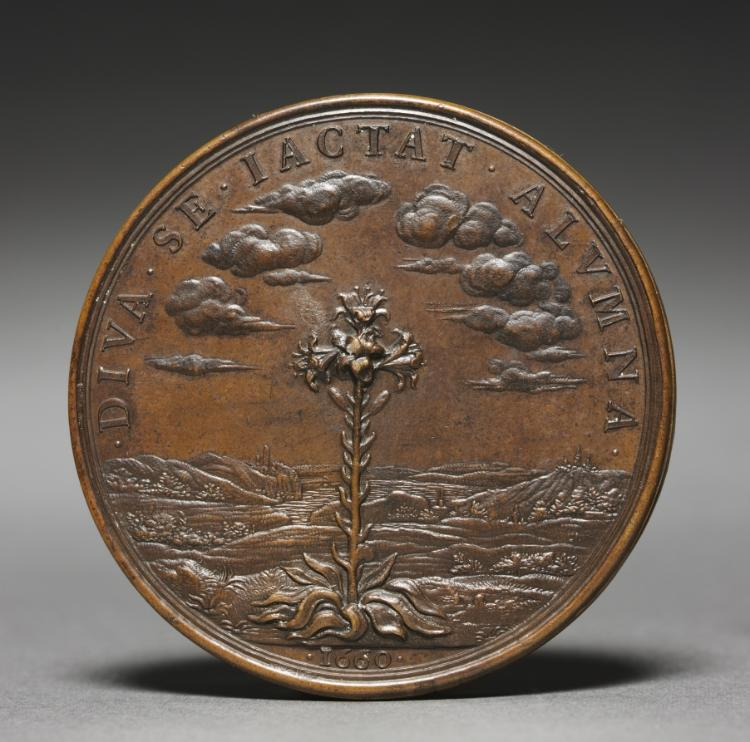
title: Medal of Anne of Austria (reverse)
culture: France, 17th century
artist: Jean Warin (French, 1604–1672)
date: 1660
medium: bronze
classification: Sculpture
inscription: inscribed: DIVA.SE.IACTAT.ALVMNA. .1660. [This translates as "It glories in its divine nourishment," which refers to the young King, Louis XIV (lily). The fleur-de-lis had long been the chief royal symbol of France.]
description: Jean Warin was the foremost medalist in 17th-century France. As the chief designer of coins, his relationship with King Louis XIII was exceptionally close; he convinced the king that commemorative medals were the most important artistic medium for propaganda. Warin revolutionized the production of medals by introducing the raised edge, allowing greater ease in striking medals. This change fueled the shift from casting medals to the more recently invented process of striking, or pressing medals from a die. This work is one of many he composed of Queen Anne of Austria (1601–1666). Although she was born in Spain as the Infanta, or princess, of Spain and Portugal, her title "of Austria" refers to her Hapsburg heritage as well as her title of Archduchess of Austria. The reverse depicts a blooming lily, a symbol of France, and is inscribed "its glories in its divine nourishment," referring to her son, the adolescent King Louis XIV.